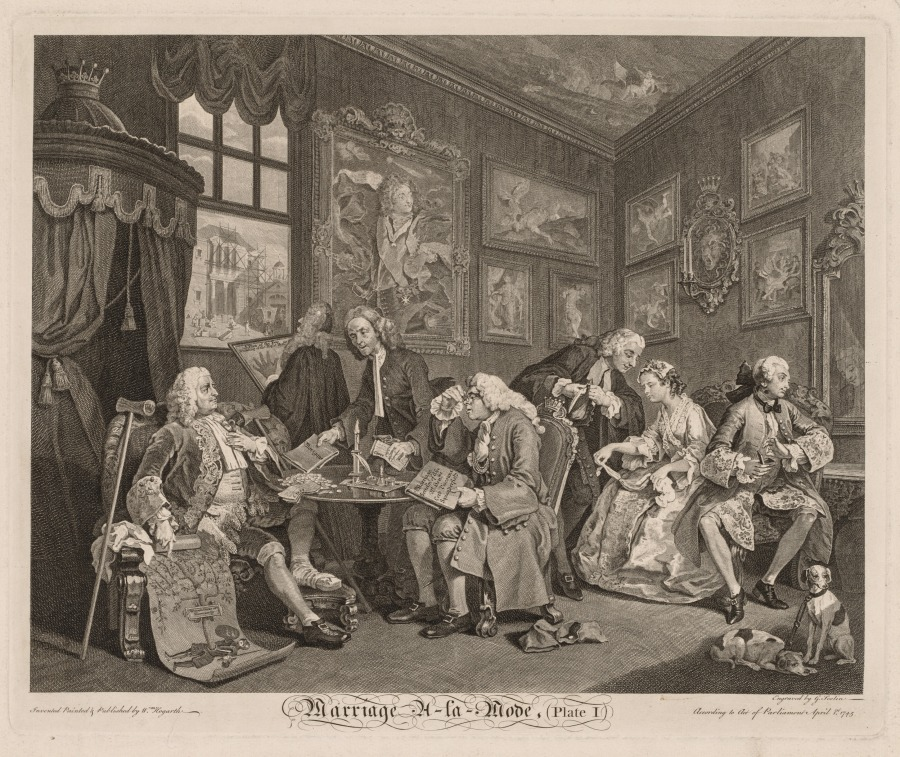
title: The Marriage Settlement, Plate 1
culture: England, 18th century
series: Marriage à la Mode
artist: Gérard Jean-Baptiste Scotin II (French, 1698–1760)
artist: after William Hogarth (British, 1697–1764)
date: 1745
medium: Etching and engraving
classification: Print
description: William Hogarth bitingly satirized the follies of Enlightenment high society in Marriage à la Mode, a print series whose title roughly translates as “marriage in the current fashion.” The series follows the story of an incompatible marriage arranged for financial and social gain. Here, the impoverished Earl of Squander gestures to his exalted family tree as he haggles over the marriage contract between his son and a wealthy alderman’s daughter. Uninvolved in the negotiations, the young couple sit side by side completely uninterested in each other. While Viscount Squanderfield gazes at his reflection, his bride-to-be listens to the flirtatious lawyer, Silvertongue, with whom she will later conduct an affair.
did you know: Objects and paintings in the background of William Hogarth’s compositions often echo or comment on the central narrative being depicted.